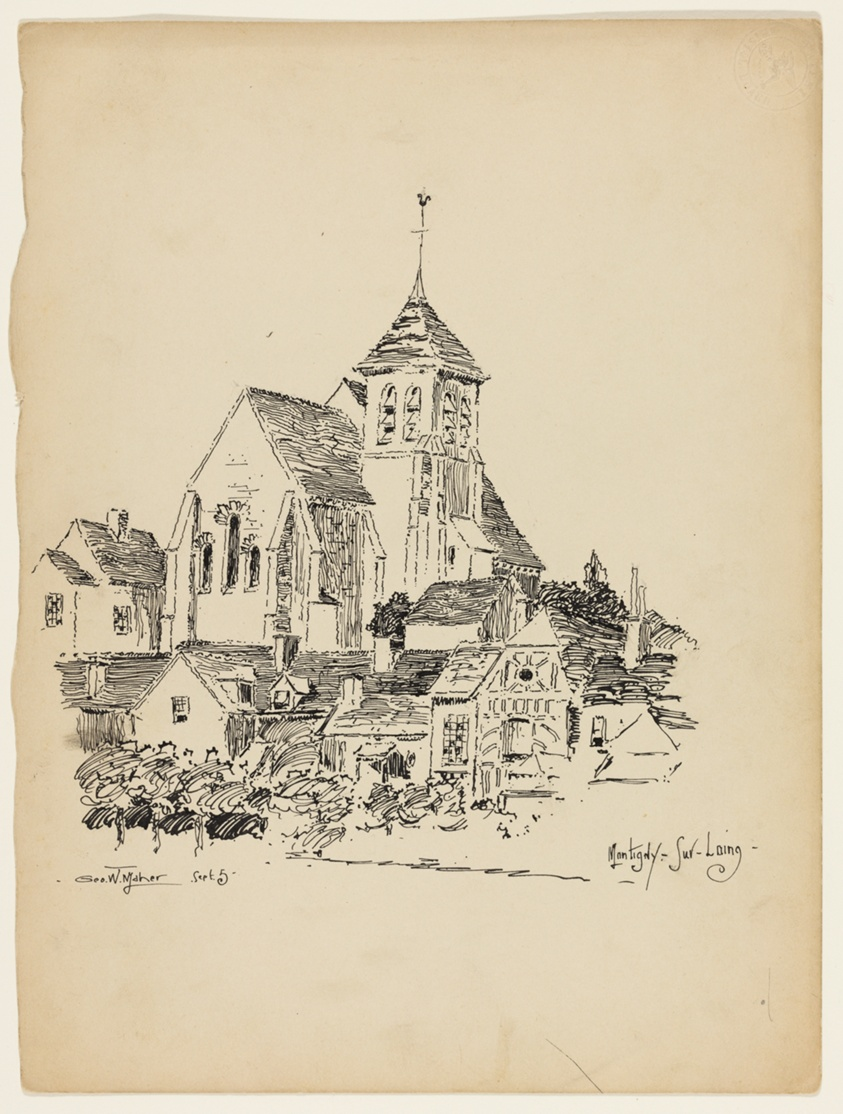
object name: Architectural Drawing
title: Church at Montigny-Sur-Loing, France, Travel Sketch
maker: George Washington Maher (American, 1864–1926)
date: 1891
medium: Ink on heavy paper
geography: United States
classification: drawings (visual works); architecture; architectural drawing